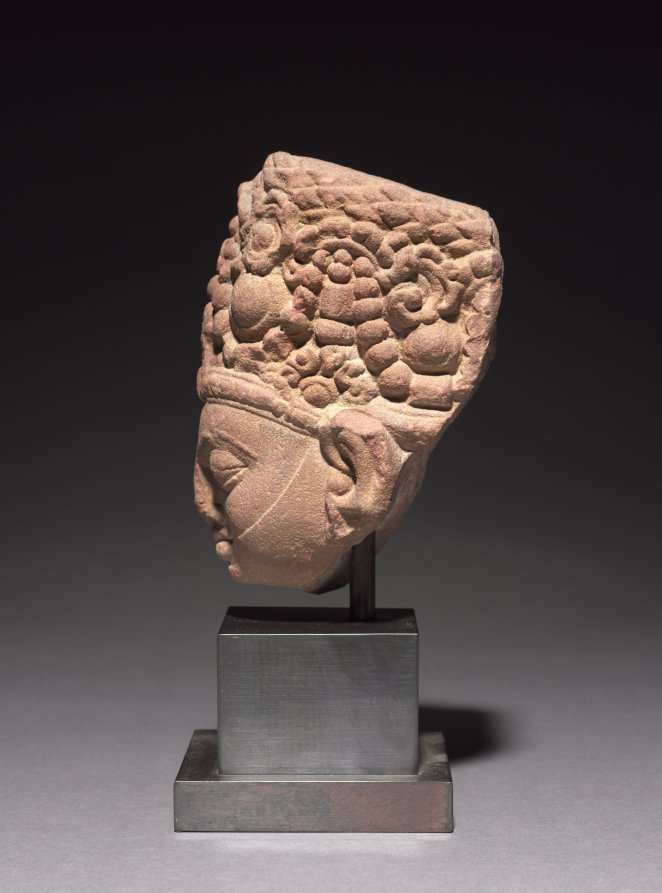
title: Head of Surya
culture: India, Mathura, Post-Gupta period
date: c. 500s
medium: spotted red sandstone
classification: Sculpture